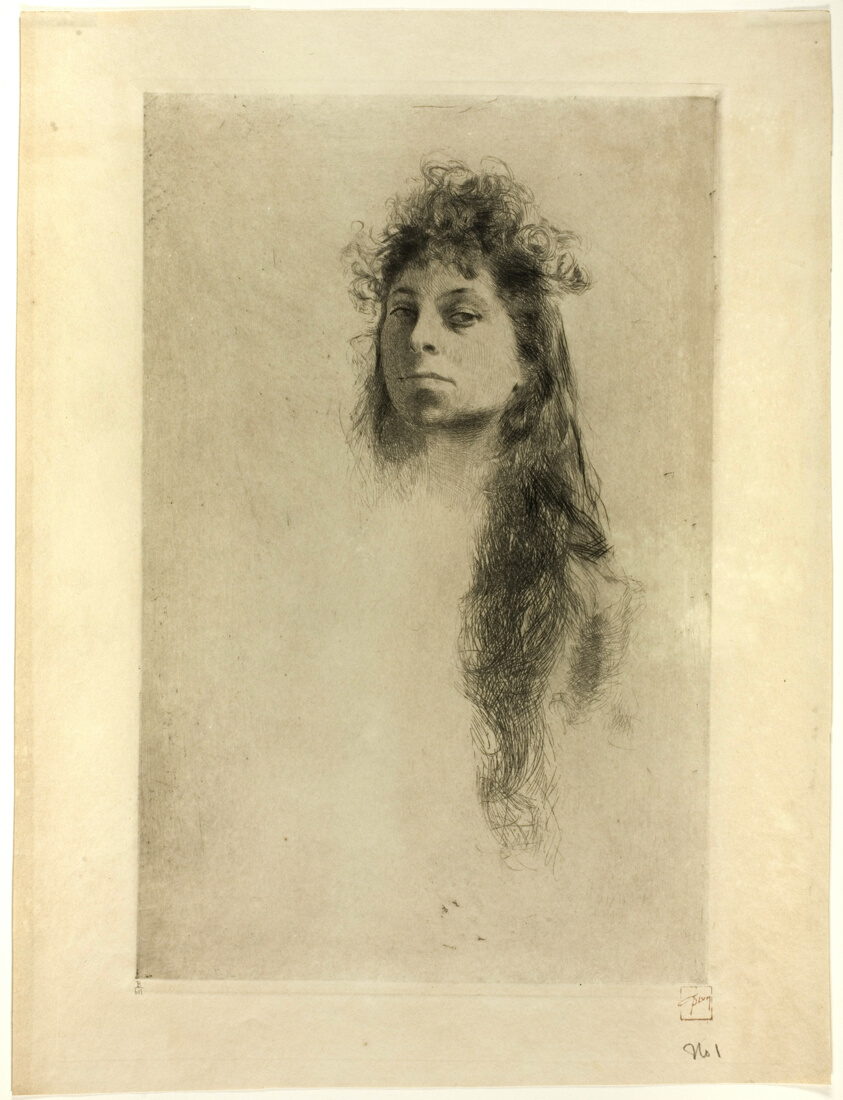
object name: Print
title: Head of a Woman with Long Hair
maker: Robert Frederick Blum (American, 1857-1903)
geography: United States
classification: etching; print; prints and drawing